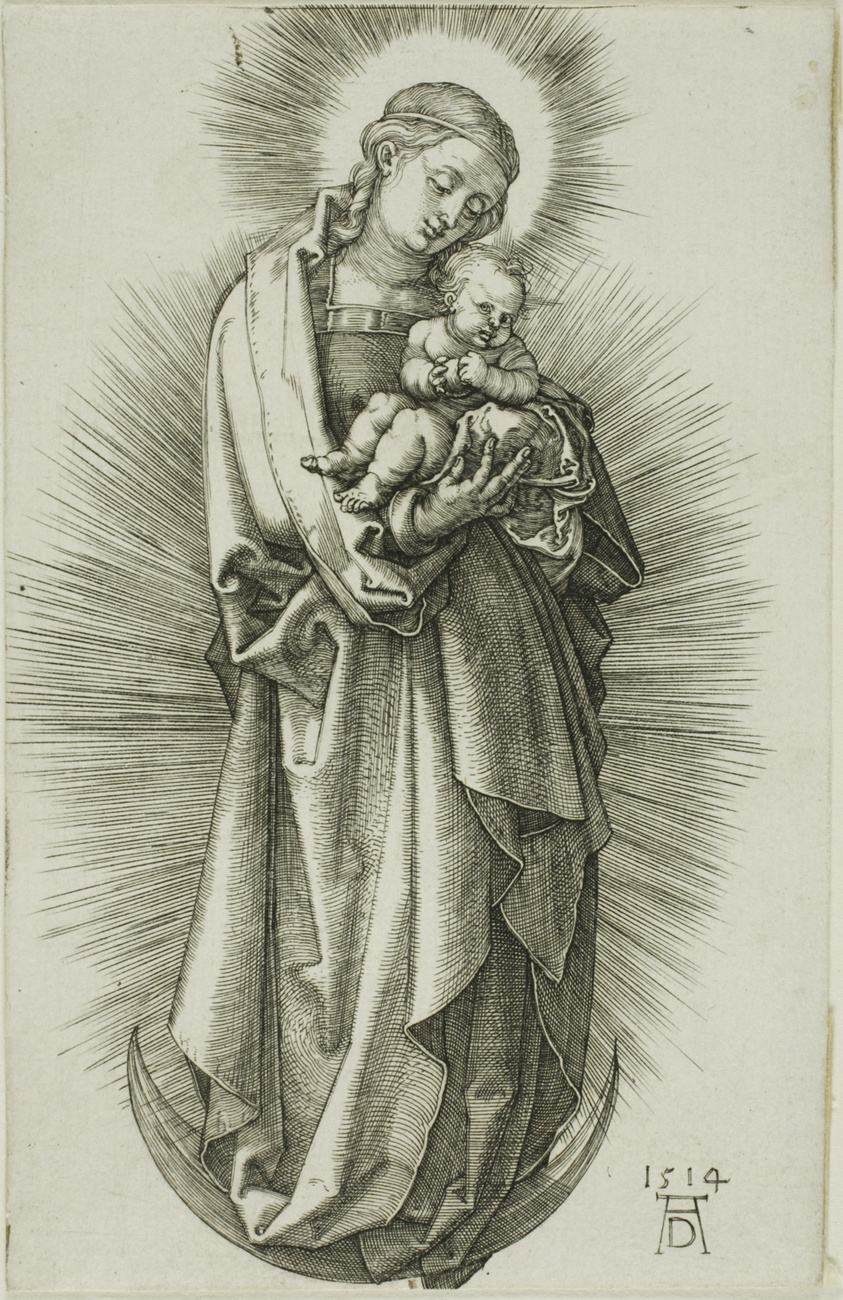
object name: Print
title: The Virgin on the Crescent with a Diadem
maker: Albrecht Dürer (German, 1471-1528)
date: 1514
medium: Engraving in black on off-white laid paper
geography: Germany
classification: engraving; print; prints and drawing; paper